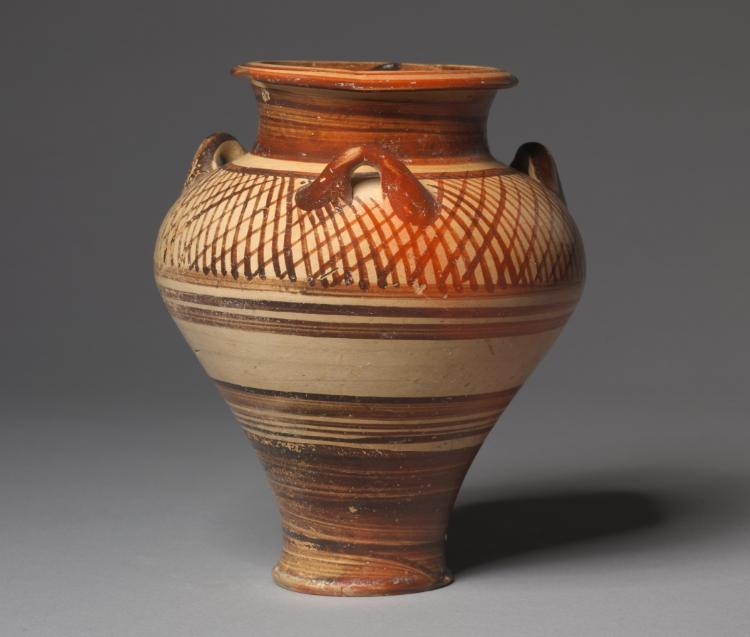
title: Piriform (Pear-Shaped) Jar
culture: Greek, Mycenaean, Late Helladic IIIA1-2b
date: c. 1400–1300 BCE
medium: ceramic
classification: Ceramic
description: This shape was popular in its time as the amphora was several hundred years later, and probably served a similar function as a storage vessel. It was exported and imitated all over the Mediterranean world during the late Bronze Age.